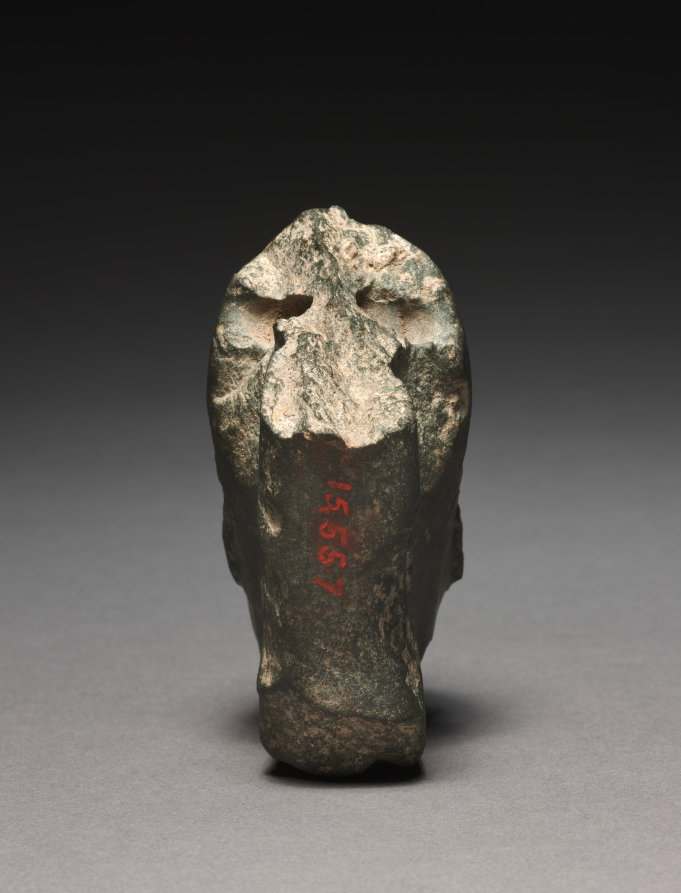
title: Head of a King or Osiris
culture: Egypt, Modern forgery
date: 1900–1915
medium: graywacke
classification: Sculpture